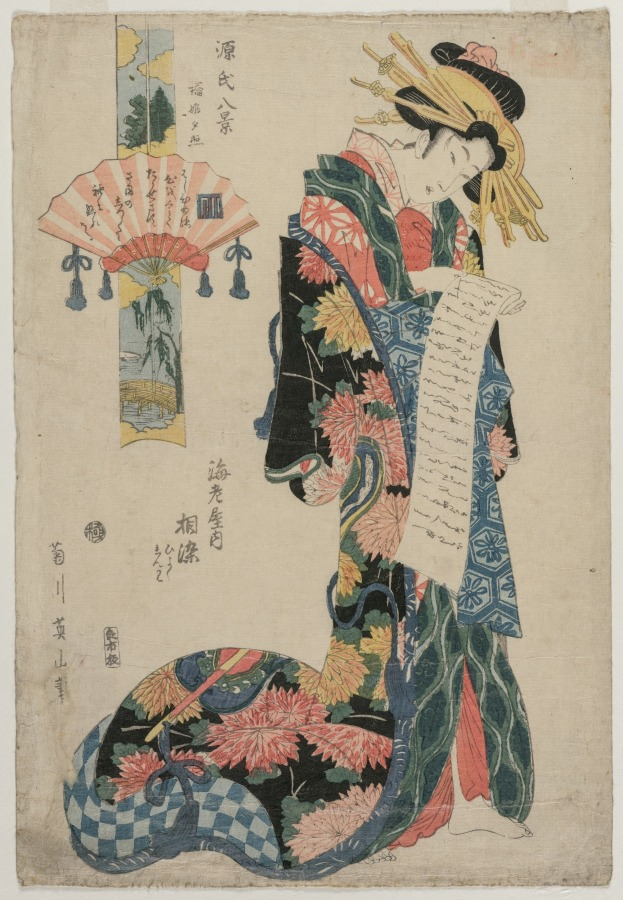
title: The Courtesan Aizome of the Ebiya (From the series Eight Views of the Tale of Genji)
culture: Japan, Edo period (1615–1868)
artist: Kikukawa Eizan (Japanese, 1787–1867)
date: c. late 1800s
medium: color woodblock print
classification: Print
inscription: Signature: Kikugawa Eizan hitsu